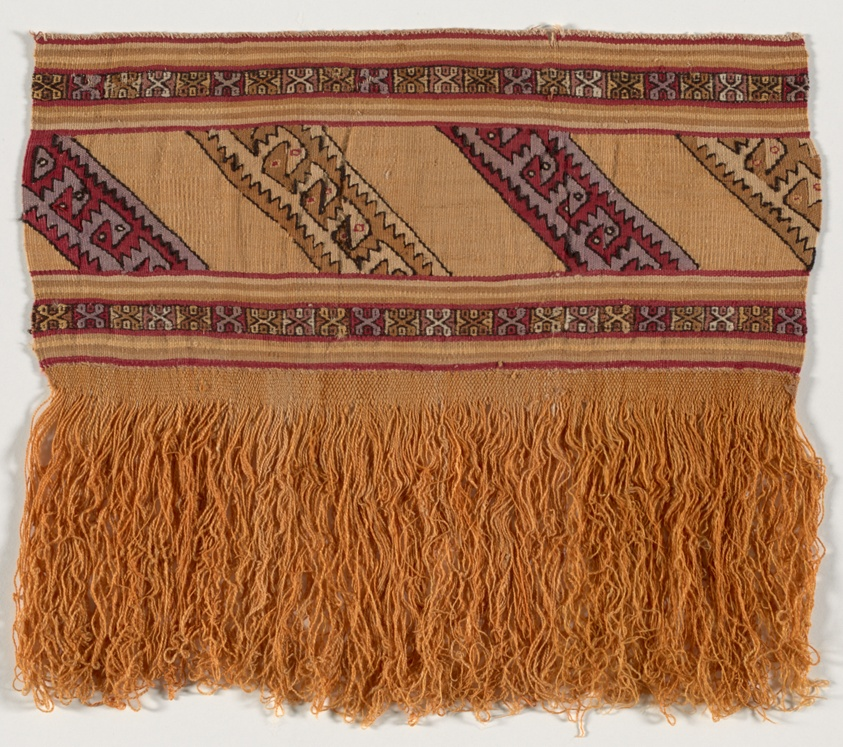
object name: Textile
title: Border Fragment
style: chancay, inca, late intermediate period, Pre-Columbian, americas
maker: Chancay (Central coast, Peru)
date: A.D. 1000/1476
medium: Cotton and wool (camelid), bands of plain weave, slit tapestry weave with wrapping outlining wefts, and three-color complementary weft weave; edged with plain weave extended weft loop fringe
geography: Peru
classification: weaving; textile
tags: insects, birds, lines, scorpions, stepped motif